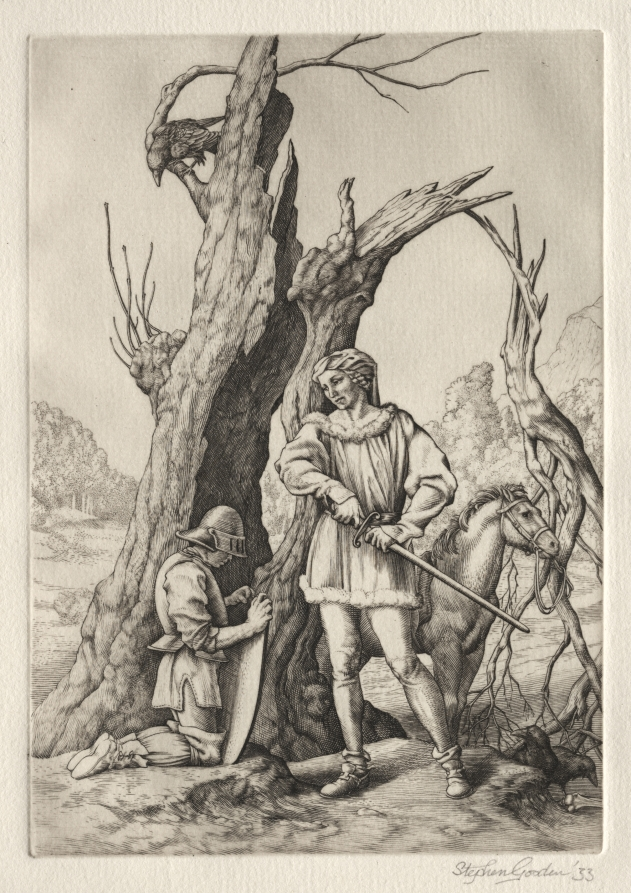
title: Peronnik the Fool: Peronnik and Sir Gilles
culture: England, 20th century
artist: Stephen Gooden (British, 1892–1955)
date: 1933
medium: engraving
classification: Print